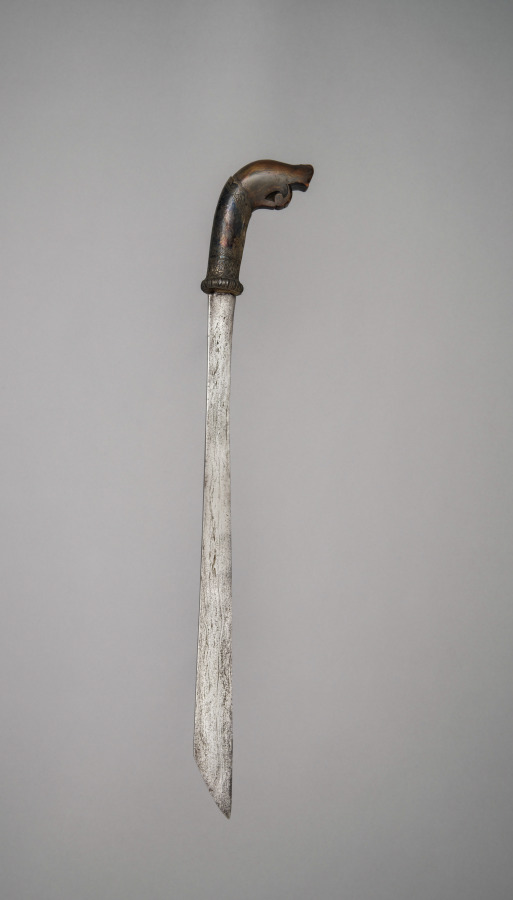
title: Sword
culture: Indonesia, Sulawesi (Celebes)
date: before 1918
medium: metal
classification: Arms and Armor